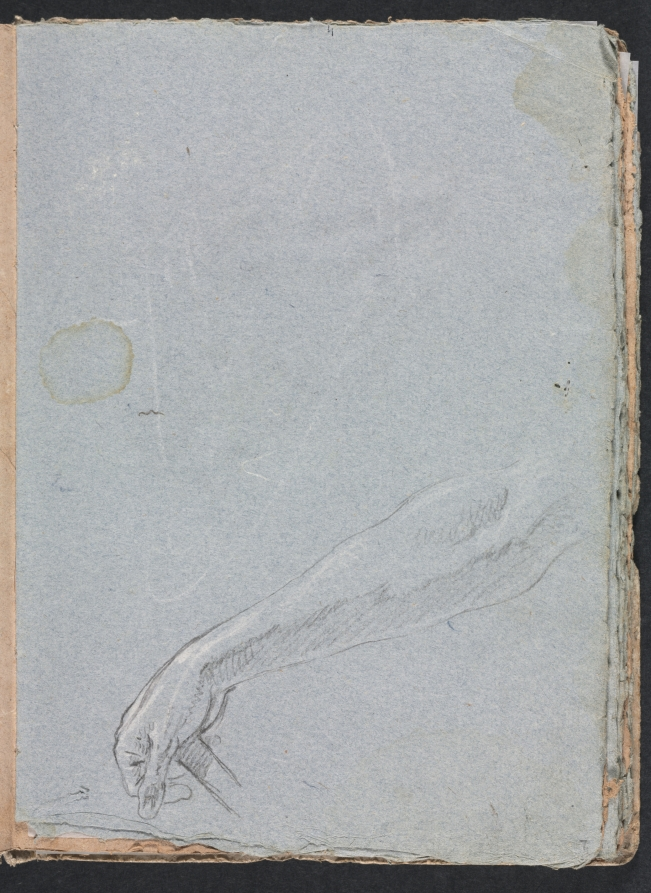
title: Verona Sketchbook: Right hand (page 7)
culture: Italy, 18th century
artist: Francesco Lorenzi (Italian, 1723–1787)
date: 1760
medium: black chalk with white heightening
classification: Bound Volume